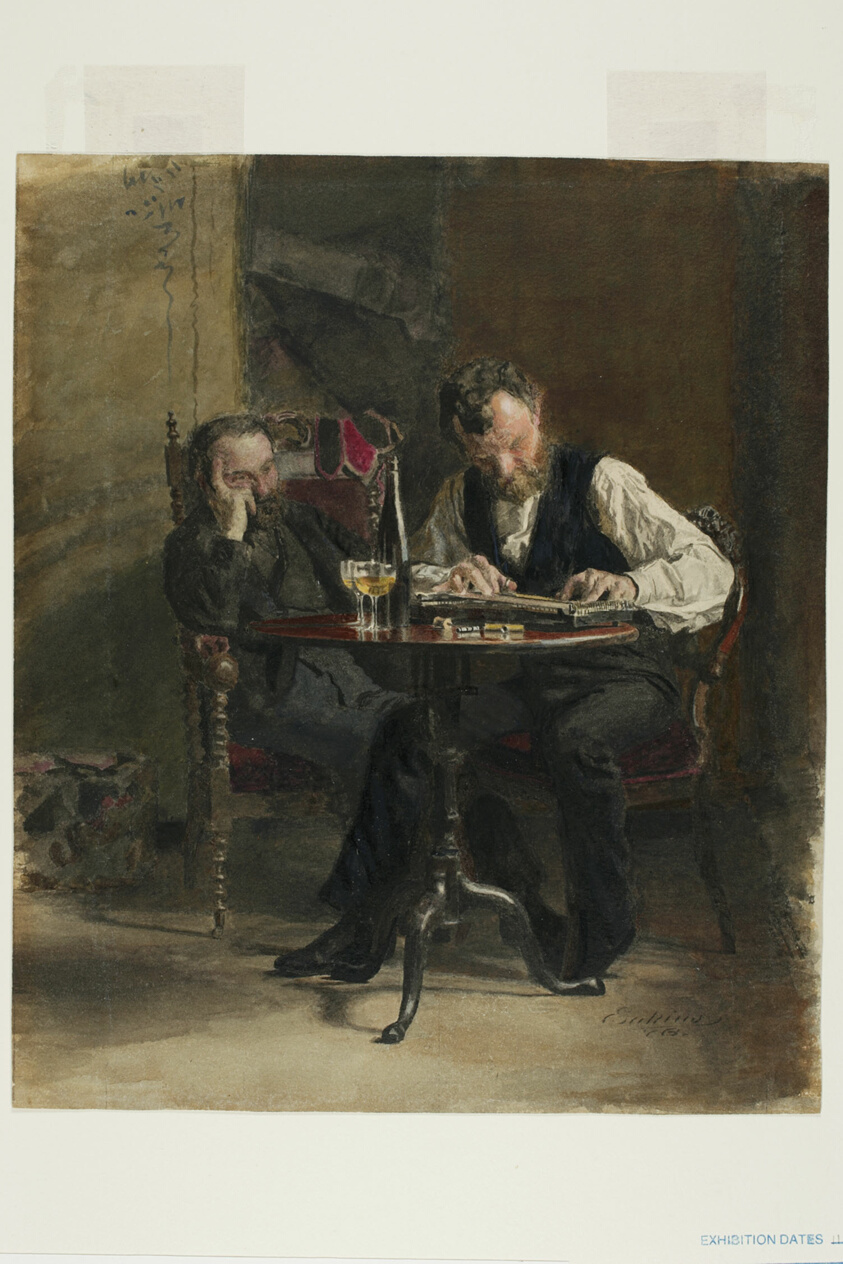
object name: Drawing and Watercolor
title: The Zither Player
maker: Thomas Eakins (American, 1844-1916)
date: 1876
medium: Watercolor on cream wove paper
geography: United States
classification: watercolor; drawings (visual works); prints and drawing